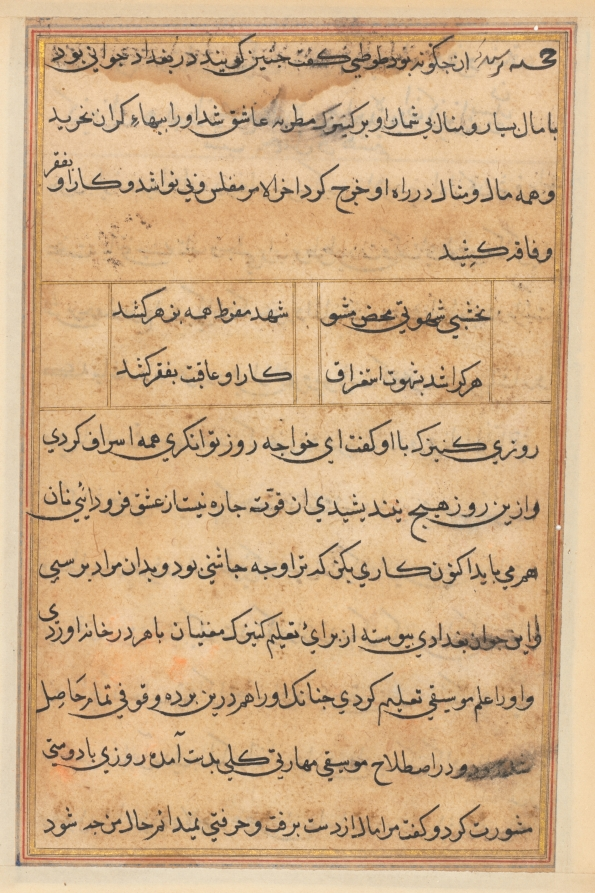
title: Page from Tales of a Parrot (Tuti-nama): text page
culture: Mughal India, court of Akbar (reigned 1556–1605)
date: c. 1560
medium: gum tempera, ink, and gold on paper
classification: Painting